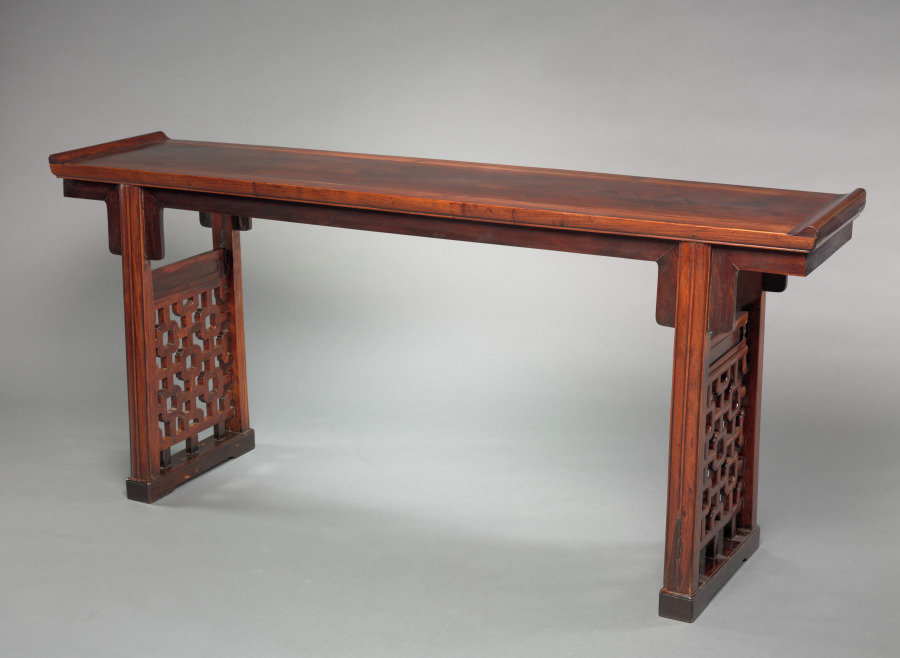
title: Altar Table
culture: China, Ming dynasty (1368–1644)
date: 1368–1644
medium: Rosewood (huanghuali)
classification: Furniture and woodwork